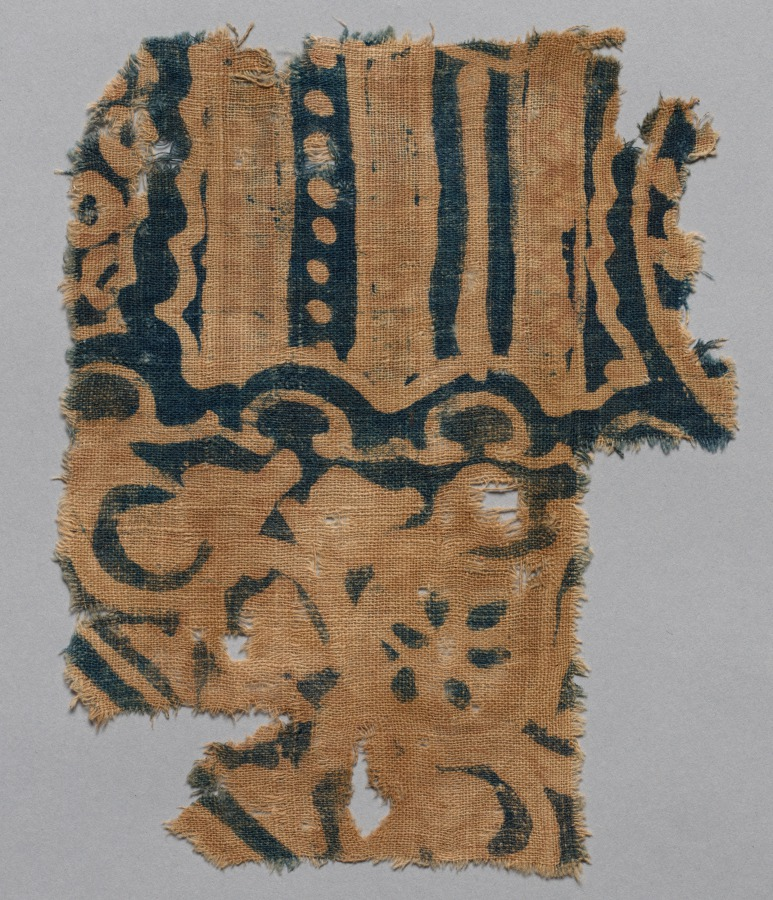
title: Fragment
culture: India, 12th-14th century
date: 1100s - 1300s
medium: plain cloth, resist dyed; cotton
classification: Textile